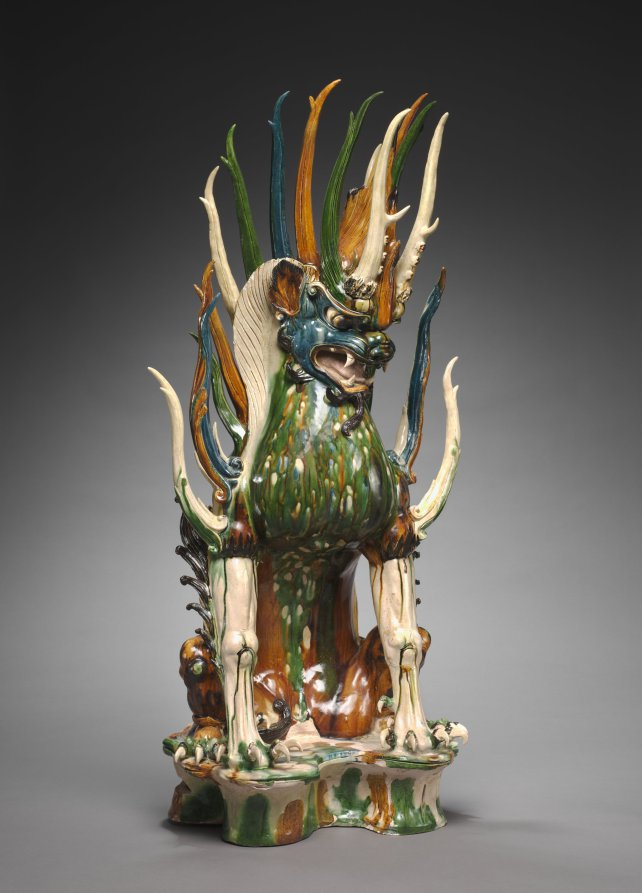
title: Tomb Guardian with Animal Head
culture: China, probably Shaanxi province, Xi'an, Tang dynasty (618-907)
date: early 700s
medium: glazed earthenware, sancai (three-color) ware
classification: Ceramic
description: With their fierce expressions and exaggerated physical features, fantastic guardian creatures were intended to guard the entrance to a tomb, warding off evil as well as keeping the soul of the deceased from wandering. Known as "earth spirits" or qitou, this one has an animal face and a pair of antlers growing above its eyebrows; the other sports a human face with huge protruding ears and a short horn surrounded by fiery, twisting hair. Their many elongated spikes heighten the fearful intensity. Before tomb sculptures were placed in the tomb, they were carried through the streets in a funerary procession. Funerary gifts provided the deceased with means for the afterlife. They were also an expression of filial piety and demonstrated the wealth and power of the descendants.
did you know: Sancai (three-color) glazes in green, amber, and transparent white, plus expensive cobalt blue glaze, show the high social status of the tomb’s occupant.